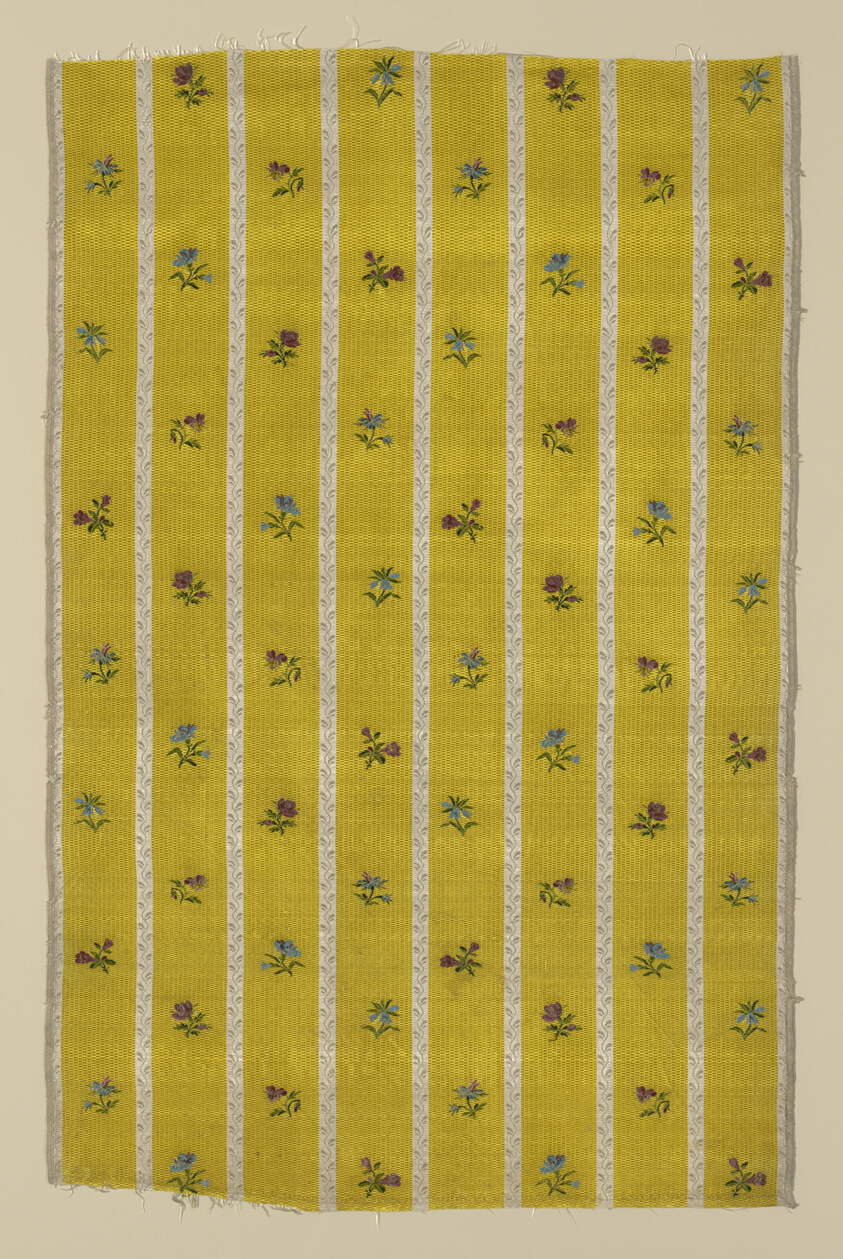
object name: Textile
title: Panel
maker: France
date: 1770/80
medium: Silk and silk chenille, plain weave with supplementary patterning warps tied in plain and satin interlacings, supplementary pattening wefts, and supplementary brocading wefts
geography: France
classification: textile; weaving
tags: flowers